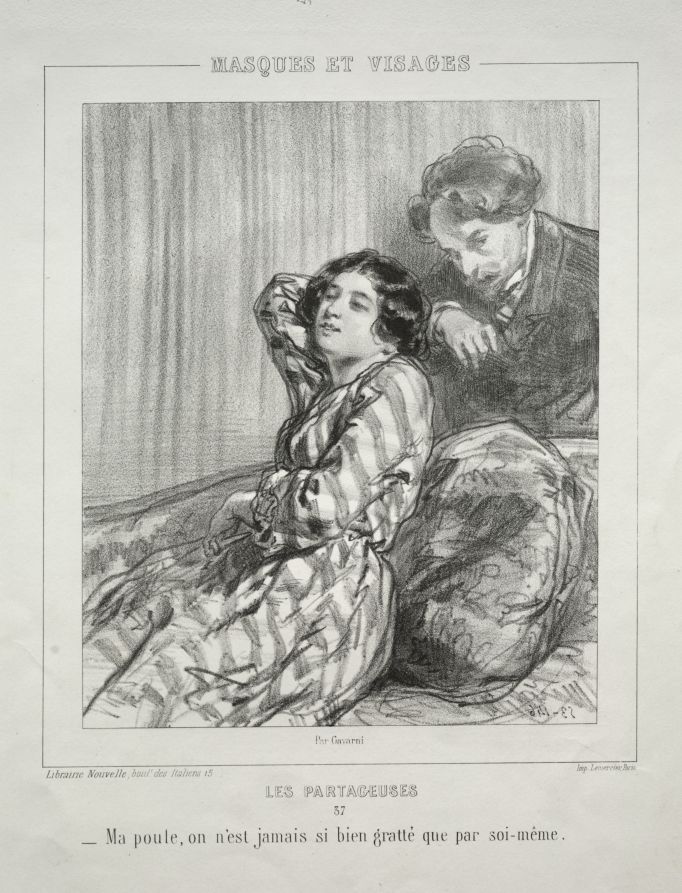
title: Les Partageuses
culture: France, 19th century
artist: Paul Gavarni (French, 1804–1866)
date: 1850s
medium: lithograph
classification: Print